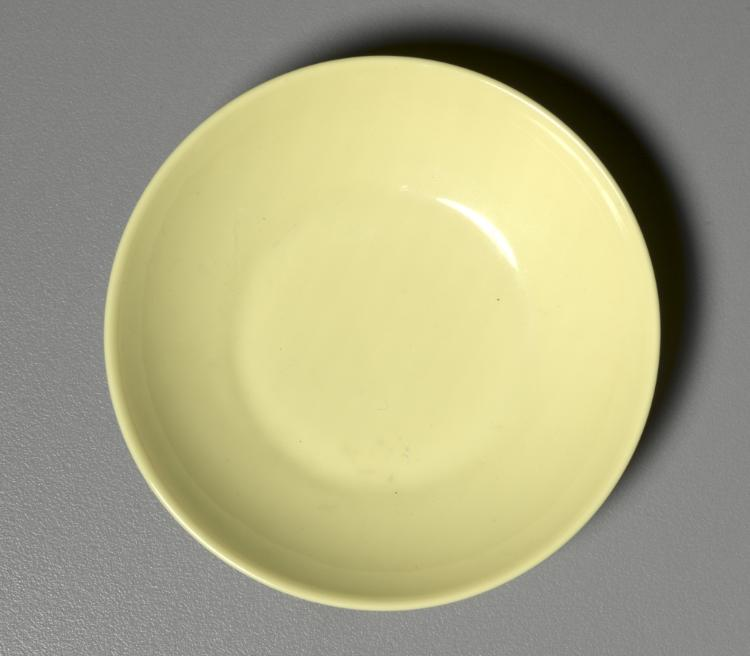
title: Small Dish with Yellow Monochrome Glaze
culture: China, Qing dynasty (1644-1911), Yongzheng mark and reign (1723-35)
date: 1723–35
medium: enameled porcelain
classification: Ceramic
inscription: 大清雍正年制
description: In the Qing dynasty (1644–1911), luxury items became more affordable to larger parts of the society, including women, merchants, and literati in non-official positions. Imperial patronage and a growing urban population encouraged consumption of luxury goods and local craftmanship. This enameled porcelain illustrates the the Qing dynasty accomplishments in porcelain techniques and the creative mind of the talented artisans who sought clients on a competitive market.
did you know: This monochromatic yellow dish was made for the imperial household.